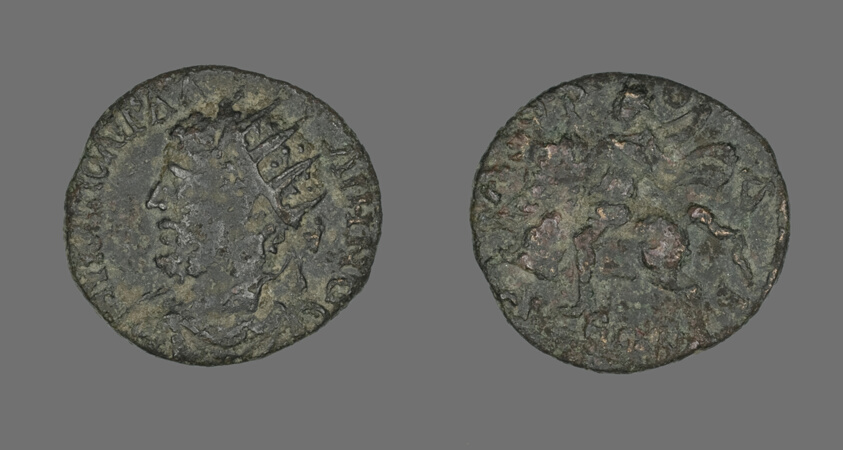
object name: Coin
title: Coin Portraying Emperor Gallienus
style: roman (ancient, style or period)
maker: Roman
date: 253-268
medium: Bronze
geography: Roman Empire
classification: coin; ancient art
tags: portrait